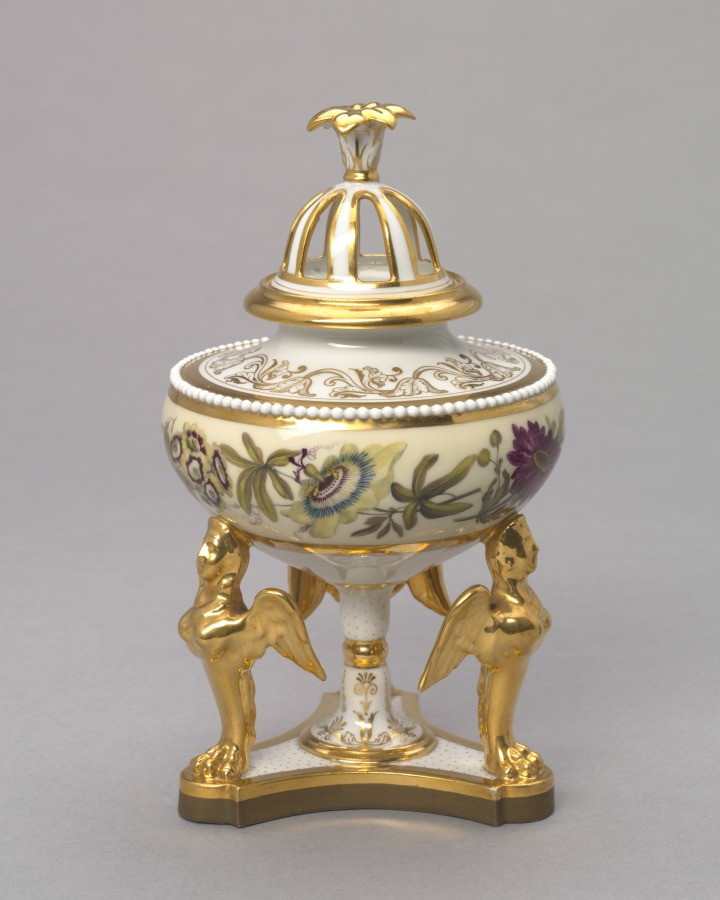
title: Urn and cover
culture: England, Worcester, 19th century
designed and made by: Flight, Barr and Barr (British)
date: c. 1815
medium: artificial porcelain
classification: Ceramic